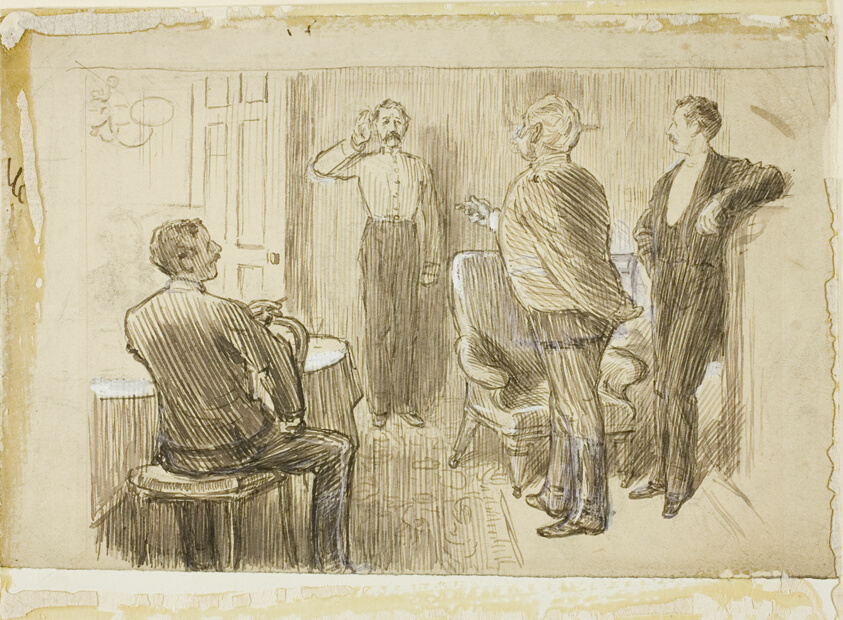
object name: Drawing and Watercolor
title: Officer and Orderly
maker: Charles Samuel Keene (British, 1823-1891)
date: 1870/91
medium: Pen and brown ink, with brush and brown wash and white gouache, over black chalk, on buff wove paper, laid down on ivory wove card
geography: England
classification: pen and ink drawings; drawings (visual works); prints and drawing